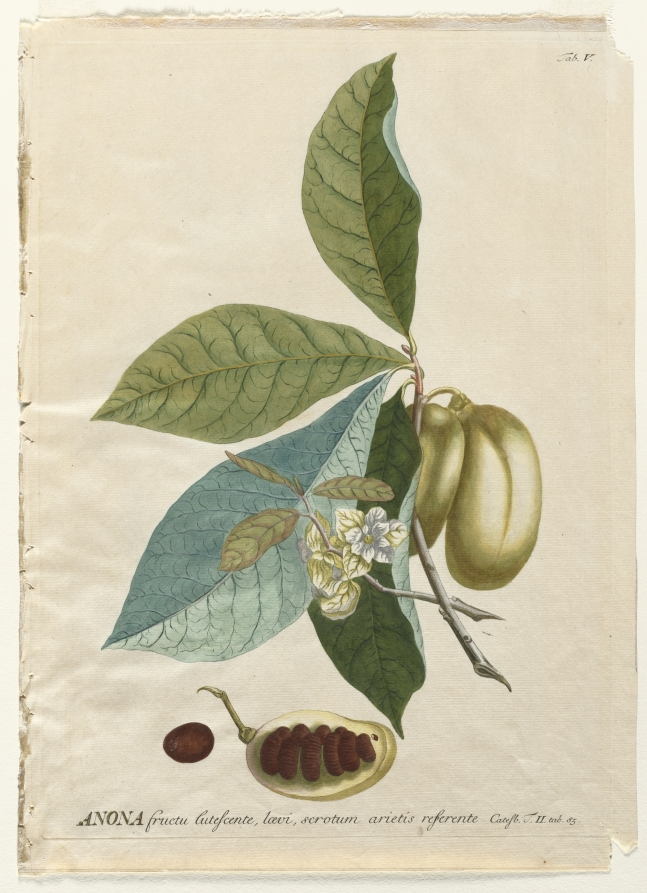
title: Plantae Selectae: No. 5 - Anona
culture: Germany, 18th century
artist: Georg Dionysius Ehret (German, 1708–1770)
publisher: Christopher Jacob Trew (German, 1695–1769)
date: published 1750–73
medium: engraving, hand-colored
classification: Print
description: A major problem in horticulture was the lack of a consistent system of classification. The first successful attempt to establish a common nomenclature was in 1724 when 20 London nurserymen published a list of all plants grown in their nurseries. Swedish botanist Carolus Linnaeus’s Systema Naturae was published in 1735; it classified 7,700 plants by their botanic structure and gave them universally applicable two-part Latin names. From then on artists had to combine scientific accuracy with artistic skill. Many of Ehret’s flower portraits were copied by printmakers and published in the great botanical iconographies of his day. His patron Dr. Christoph Jakob Trew engaged the Haids, a distinguished family of Nuremberg etchers, to translate Ehret’s crisp, vigorously drawn paintings into printed illustrations.